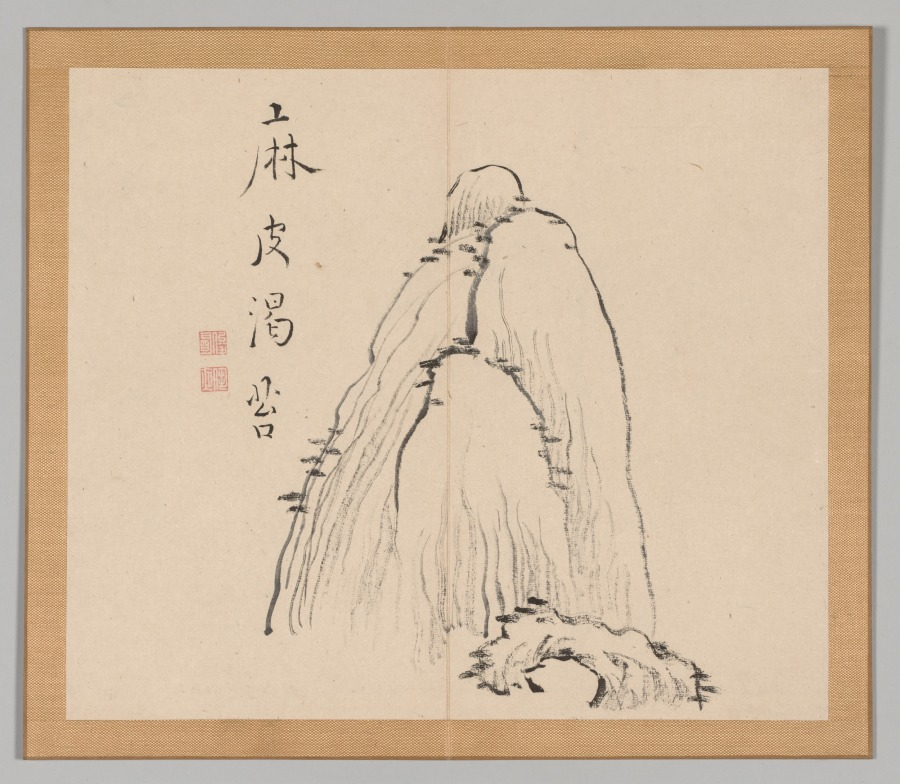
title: Reverberations of Taiga, Volume 1 (leaf 10)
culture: Japan, Edo period (1615–1868)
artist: Aoki Shukuya (Japanese, d. 1802)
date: mid- to late 1700s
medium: double-leaf from a pair of albums; ink and light color on paper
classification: Portfolio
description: Traditionally, young painters in Japan began their studies with an established master-painter. The master's compositions invariably became models that the apprentice copied to learn various ink and brush techniques. Shukuya was a pupil of the famous Kyoto artist Ikeno Taiga, whose style is reflected in these sketches of rocks, trees, and mountains.